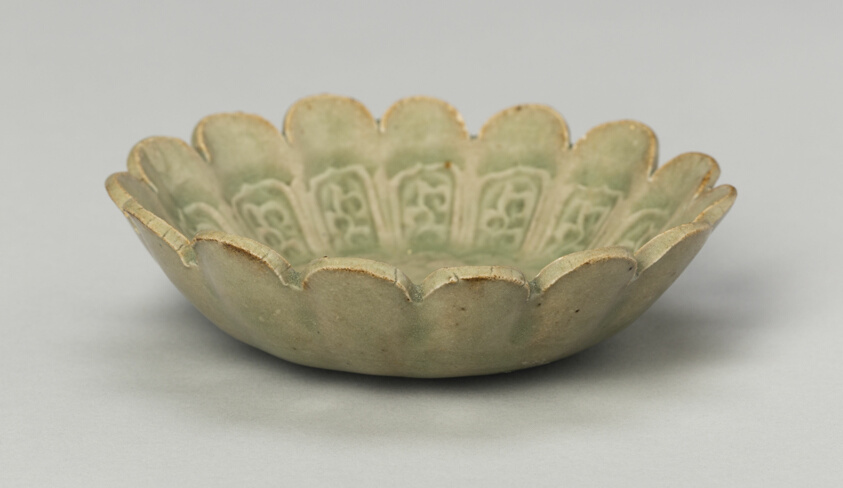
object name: Vessel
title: Scalloped Dish with Stylized Floral Sprays and Sickle-Leaf Scrolls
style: Chinese (culture or style)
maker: China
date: Northern Song (960–1127) or Jin dynasty (1115–1234), 12th/13th century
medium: Yaozhou ware; glazed stoneware with underglaze molded scrolls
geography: China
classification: dish (vessel); ceramics; vessel